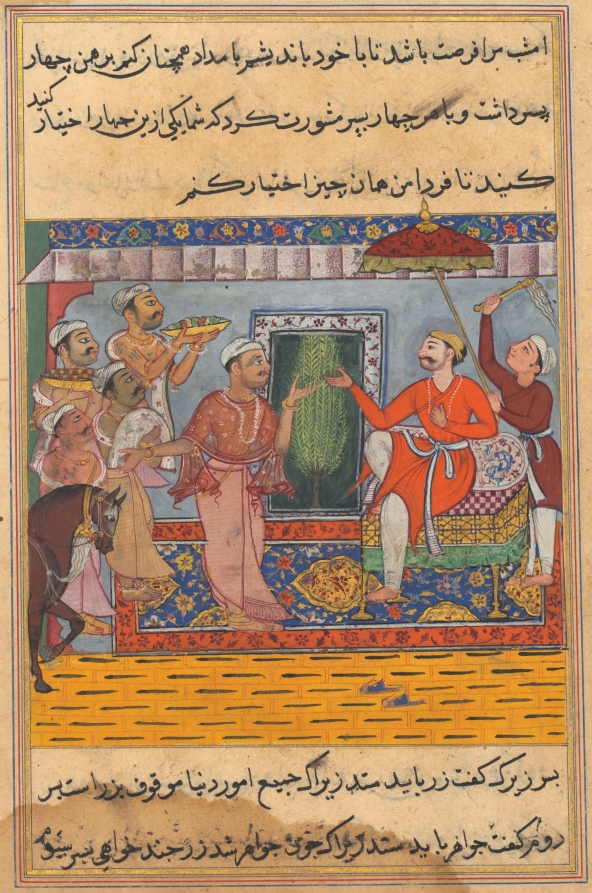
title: The Brahman, unable to select from the four gifts of the king of the Ocean seeks the Raja’s advice, from a Tuti-nama (Tales of a Parrot): Eleventh Night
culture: Mughal India, court of Akbar (reigned 1556–1605)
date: c. 1560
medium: gum tempera, ink, and gold on paper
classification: Painting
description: Behind the Brahman, four men present gold, jewels, a robe and a horse. The enthroned Raja has offered one of these gifts to the Brahman. However, after consulting with his sons, the Brahman is unable to choose the best one and returns to the Raja in frustration. The Raja, pleased with the Brahman’s honesty, allows him to keep all four.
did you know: The tree suggests a garden through the open door in the back wall.